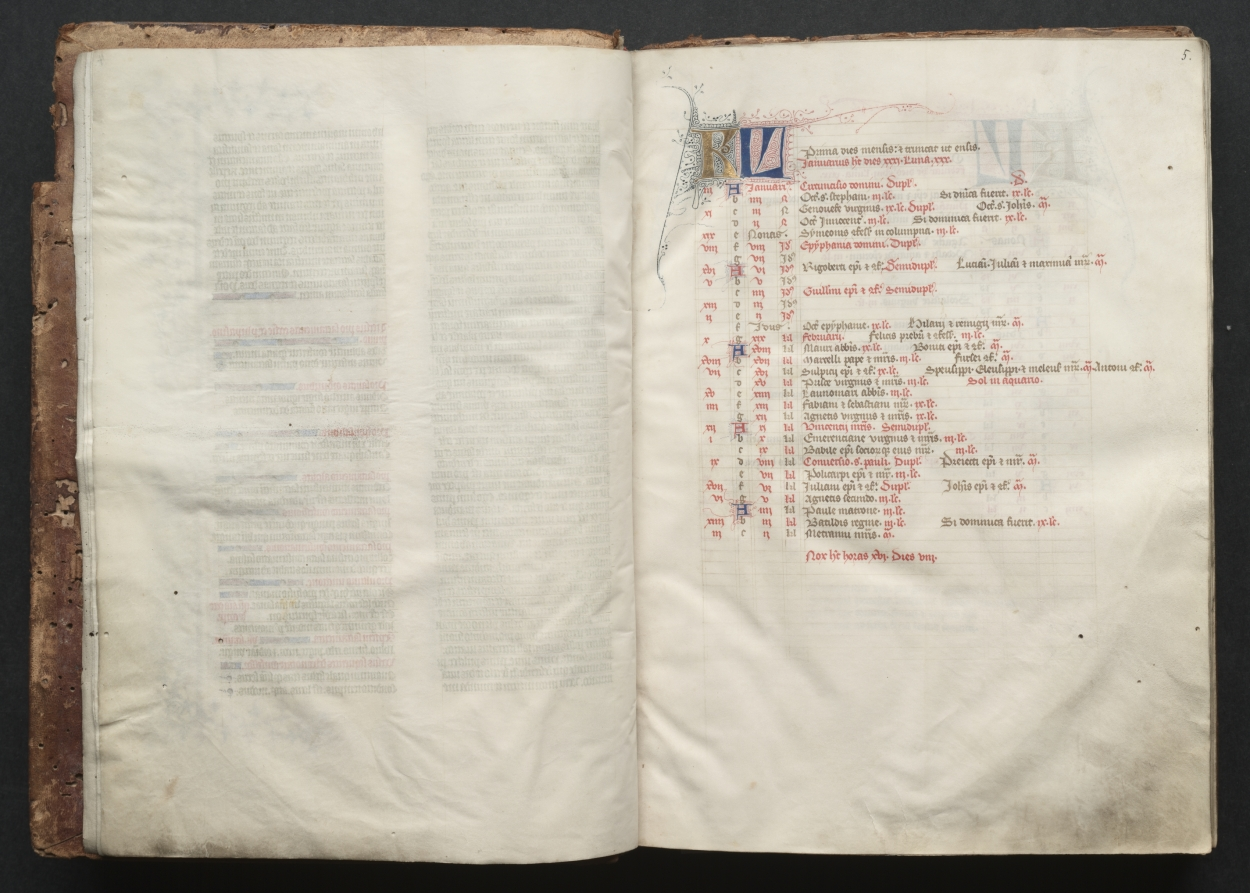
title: The Gotha Missal: Fol. 5r, Text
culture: France, Paris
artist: Master of the Boqueteaux (French)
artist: and Workshop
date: c. 1375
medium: ink, tempera, and gold on vellum; blind-tooled leather binding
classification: Bound Volume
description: The style and quality of this manuscript's decoration is typical of deluxe Parisian books made for aristocratic or royal patrons. Most of the book's decoration appears to be the work of the Master of the Boqueteaux, an artist active at the court of King Charles V (died 1380). His style was apparently shared by a number of book illuminators working in and around Paris. It is very possible that the Gotha Missal belonged to Charles V, but is not provable because the manuscript has no royal portraits and lacks a colophon. Given the book's magnificent decoration, however, it would seem that it was produced for a Valois prince, if not for the king himself. The manuscript receives its name from the German dukes of Gotha, its later owners.